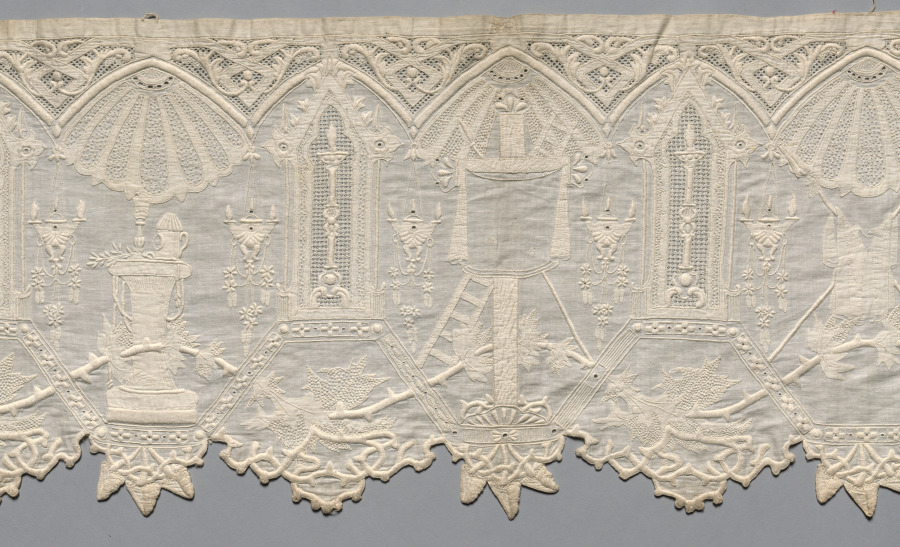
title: Altar Cloth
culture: Italy(?)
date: 1800s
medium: Plain weave cotton: needle lace (drawnwork), appliqué, and embroidery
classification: Embroidery